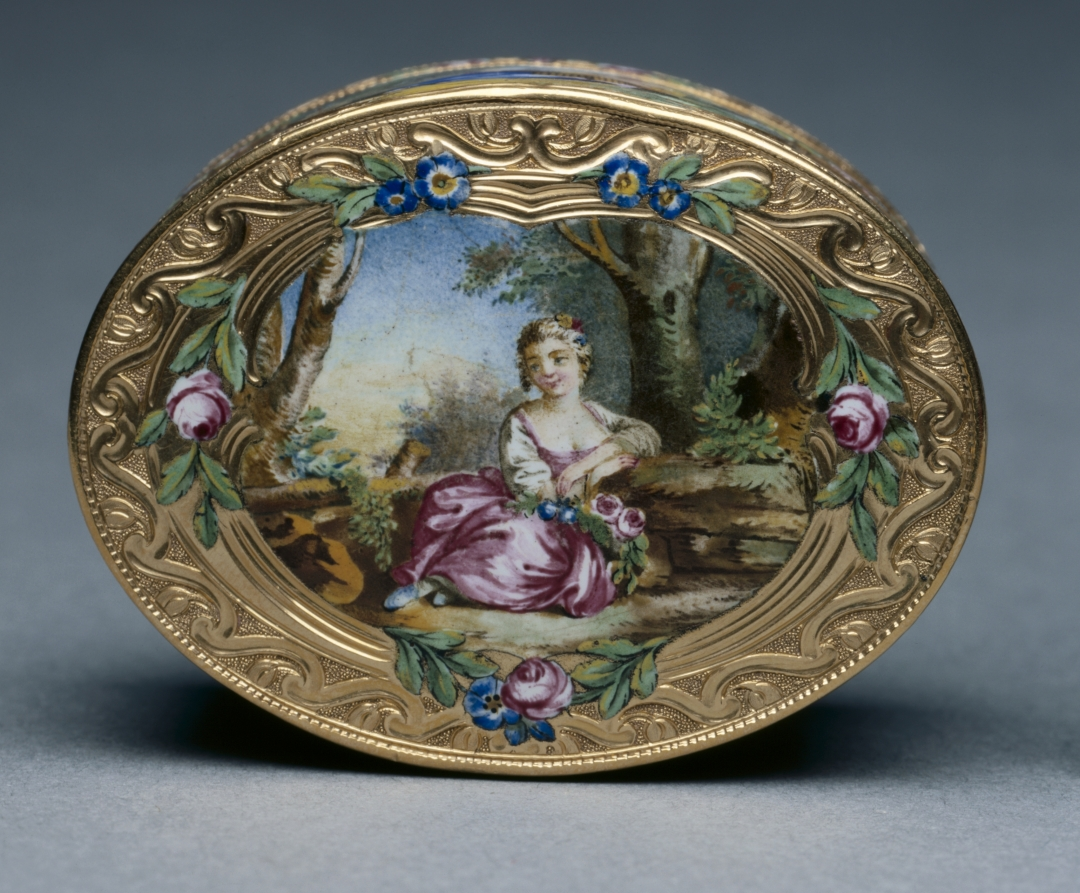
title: Snuff Box (Tabatière)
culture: France, 18th century (style of Louis XV)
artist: Francois Guillaume Tiron (French)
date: 1761–62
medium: gold and enamel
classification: Miscellaneous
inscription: [Maker's mark of Francois-Guillaume Tiron, master goldsmith in 1747, inside cover]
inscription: [Warden's mark, Paris, 1761-1762, inside cover]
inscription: [Charge mark of Eloi Brichard and Etienne Somfoye, Paris, 1756-1762, inside cover]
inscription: [Maker's mark of Francois-Guillaume Tiron, inside bottom]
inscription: [Warden's mark, 1761-1762, inside bottom]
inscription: [Charge mark of Brichard and Somfoye, inside bottom]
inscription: [Maker's mark of FG Tiron, left wall]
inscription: [Charge mark of Brichard and Somfoye, left wall]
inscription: [Warden's mark, Paris, 1761-1762, left wall]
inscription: [Discharge mark of J.J. Prevost, Paris, 1762-1768, bezel at right]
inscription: [Engraved number, maybe retailer's number]: "n. 13676"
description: The pastoral scenes that decorate this box are typical of the style of François Boucher, a celebrated painter of the period whose works were popularly reproduced on decorative arts. Snuff boxes, used practically as containers for powdered tobacco, were often decorated with miniature reproductions of notable works. The miniature on the cover is inspired by Boucher’s The Galant Pastor (Le Pasteur Gallant) (1738) and that on the bottom by The Amusement of the Shepherd Girl (L’Amusement de la Bergère) (1700s).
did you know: François Boucher was a favorite of the French royal court of Louis XV and named first painter of the king in 1765.